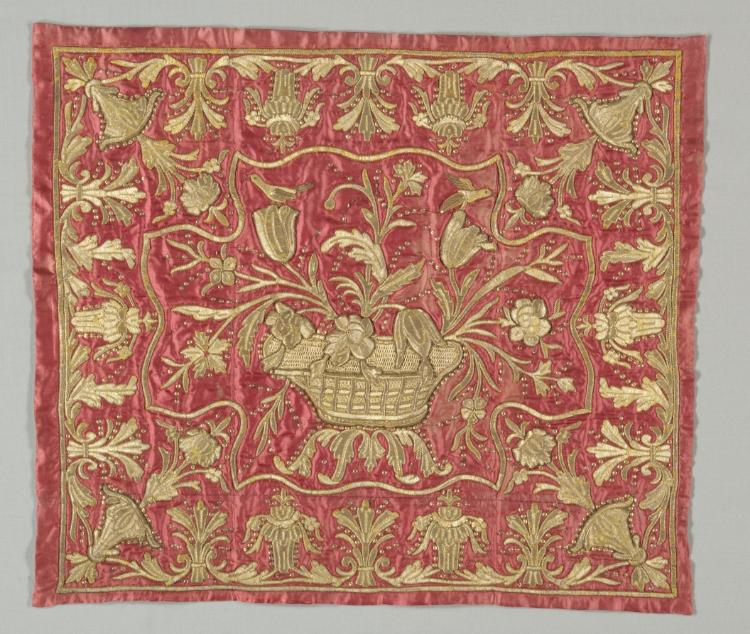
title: Embroidered Textile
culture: Turkey, 18th-19th century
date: 18th-19th century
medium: embroidery: gold filé around silk core laid over cotton, couched at edges in silk, and sequins on silk ground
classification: Embroidery